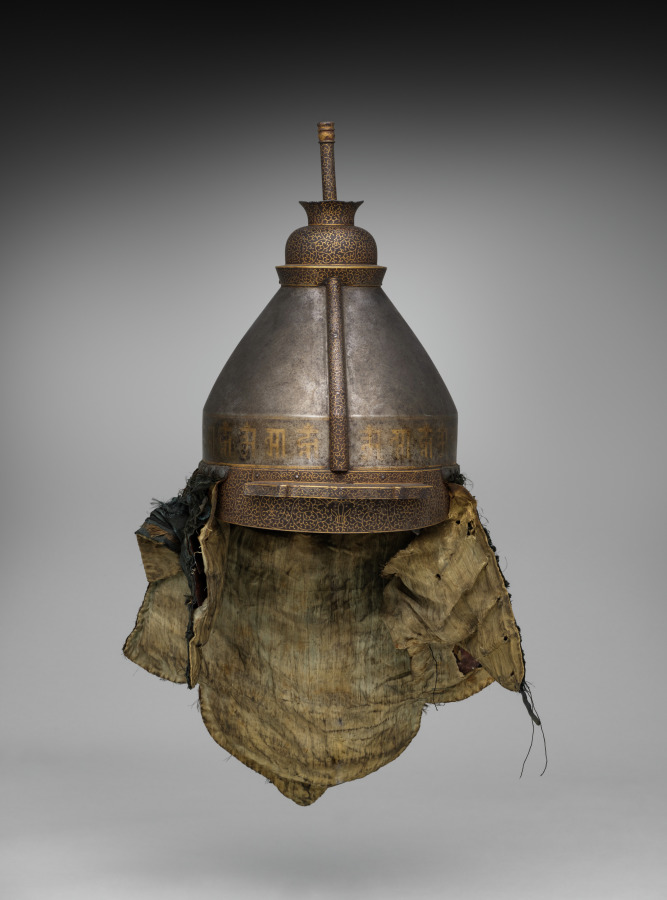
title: Helmet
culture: Sino-Tibetan, Ming dynasty (1368-1644)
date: 1368–1644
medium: iron inlaid with gold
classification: Arms and Armor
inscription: Tibetan inscription